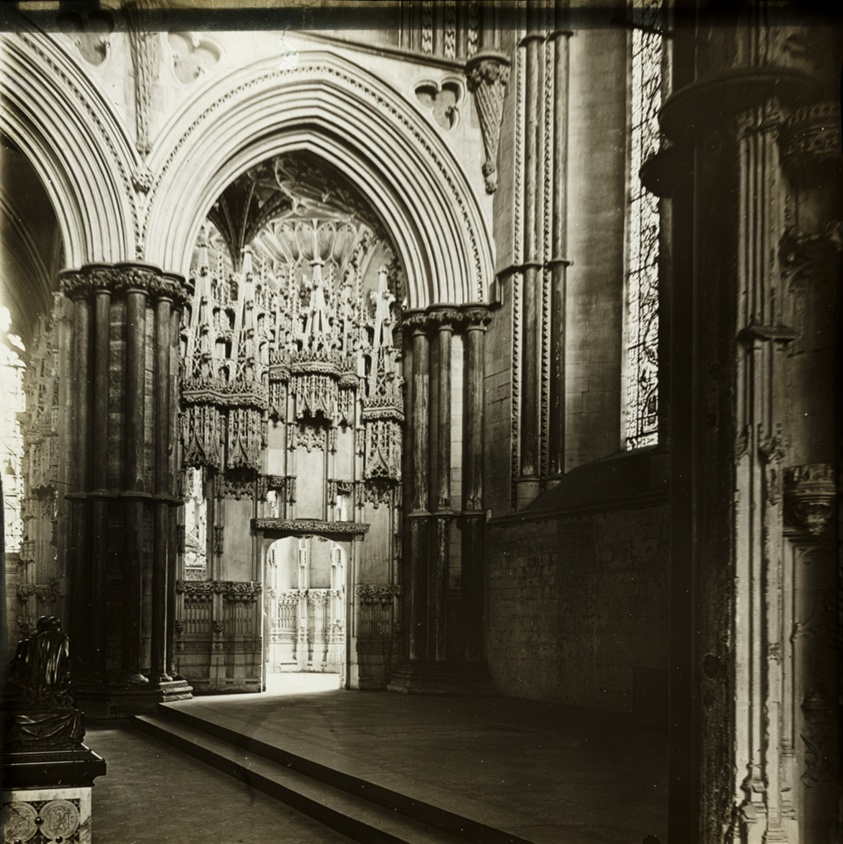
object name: Photograph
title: Ely Cathedral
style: Pictorialism, 19th century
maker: Frederick H. Evans (English, 1853–1943)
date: c. 1891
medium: Lantern slide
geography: England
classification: photograph; photography